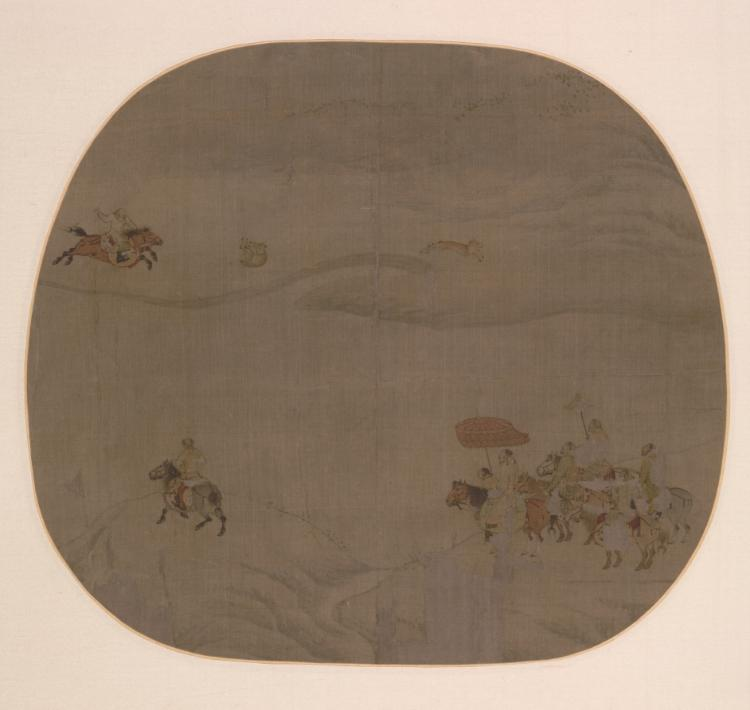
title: The Autumn Hunt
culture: China, Southern Song dynasty (1127-1279)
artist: attributed to Chen Juzhong (Chinese, active c. 1201–1207)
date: c. 1201–4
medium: album leaf, ink and color on silk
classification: Painting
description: Equestrian pursuits and hunting were particularly popular among the Khitan (also spelled “Qidan”) and Jurchen, ethnic groups who lived along China’s northeastern border. Their nomadic lifestyle intrigued the Chinese court and inspired Chinese artists to develop a painting genre of foreign people hunting.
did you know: The rider at the left has a typical Qidan hairstyle: head shaved on top with thin braids below.